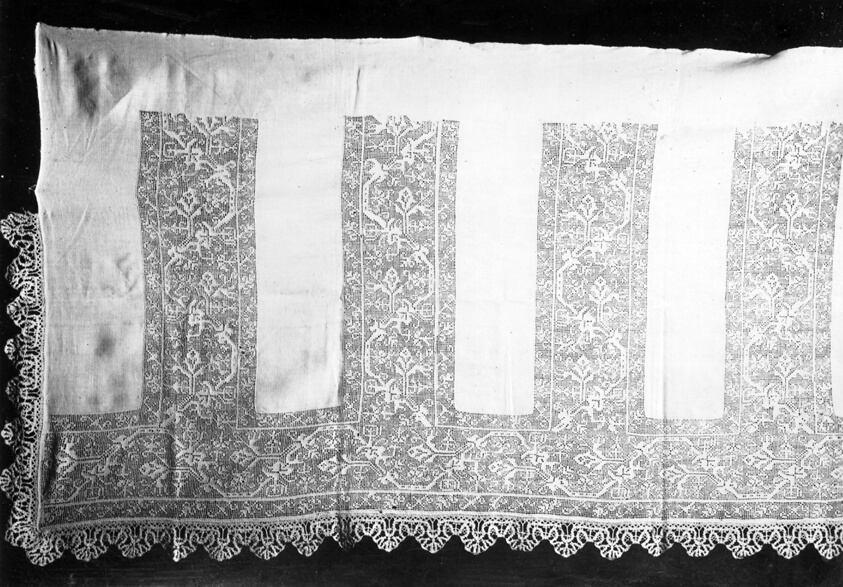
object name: Religious/Ritual Object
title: Altar Frontal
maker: Italy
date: 17th century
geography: Italy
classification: textile; needlework (visual works); altar; ritual objects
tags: altar